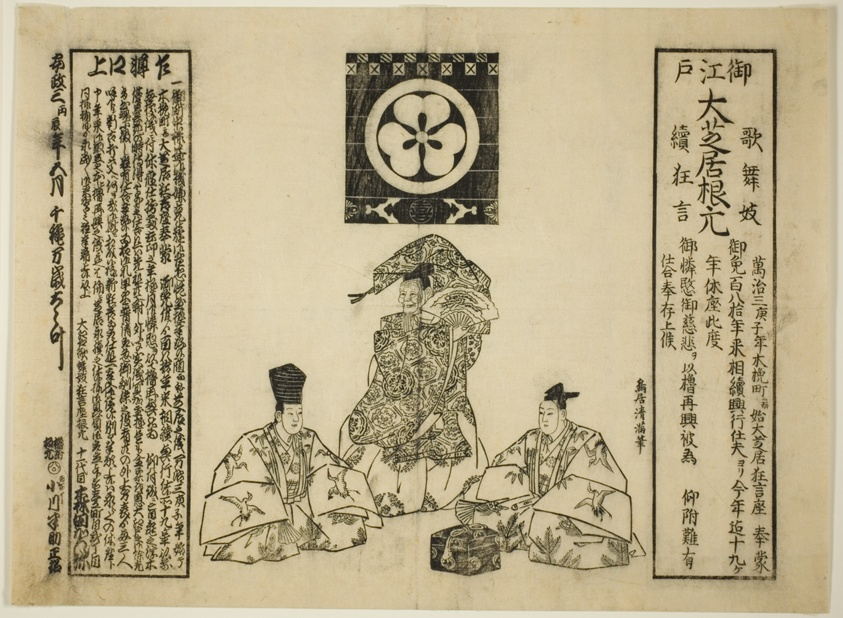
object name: Print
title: Announcement of a performance at the Morita Theater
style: Japanese (culture or style)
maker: Torii Kiyomitsu II (Kiyomine) (Japanese, 1787-1869)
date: 1856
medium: Woodblock print; sumizuri-e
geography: Japan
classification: woodblock print; print; asian art; woodblock